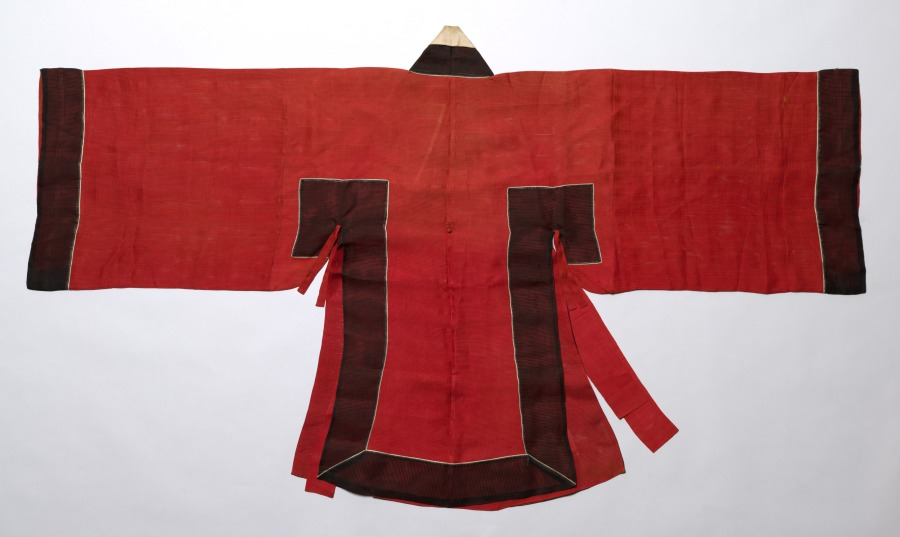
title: Overcoat for the Royal Ceremonial Costume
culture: Korea, Joseon dynasty (1392–1910)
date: late 1800s–early 1900s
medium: silk: dyed red, black, and white; gauze weave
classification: Garment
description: This is a set of royal ceremonial robe and accessories worn by a high-ranking court official for attending special state ceremonies. The set consists of an inner coat, an outer coat, a skirt, a back apron, a crown, a pair of jade tassels, a tablet, and a belt.